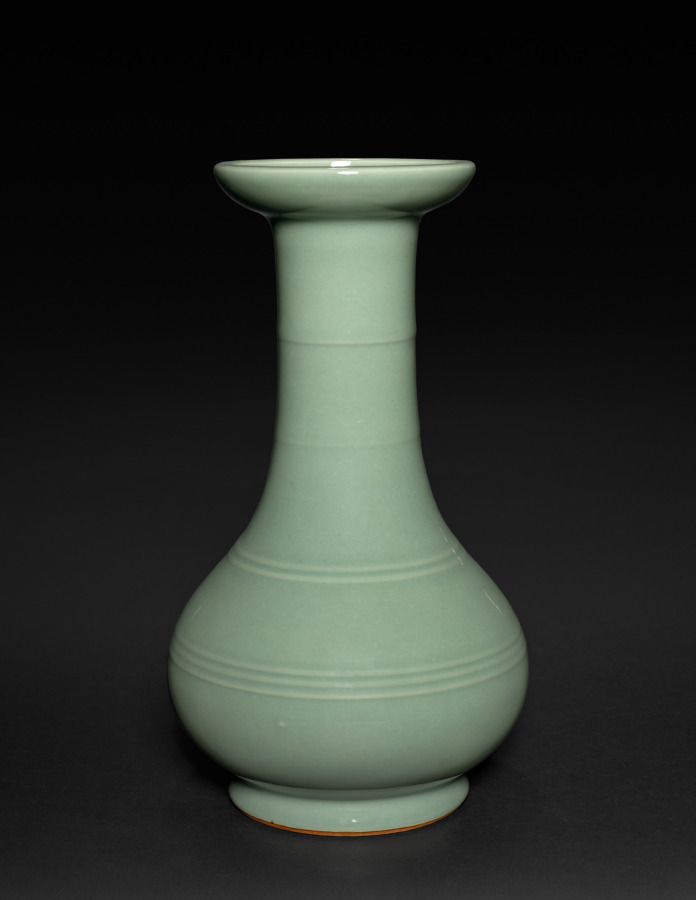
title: Vase with Bamboo Joints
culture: Japan, Taishō period (1912–26)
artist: Seifū Yohei IV (Japanese, 1872–1951)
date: 1914–46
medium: Porcelain with green glaze and molded design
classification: Ceramic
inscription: 清風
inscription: 清風造【印】清風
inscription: 成山清風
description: Yohei IV’s Vase with Bamboo Joints has a shape often seen in pairs of bronze flower vases placed to either side of Buddhist altars before sculptural icons. While the term hisoku (Chinese mise 秘色), or “mysterious color” glazing, indicates a more specific green color than seiji 青磁, a more general word for green-glazed porcelain, there is still some range in the actual color of the glaze.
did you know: Many ceramics created by the Seifū Studio refer to and emulate Chinese ceramics in form and glazing.